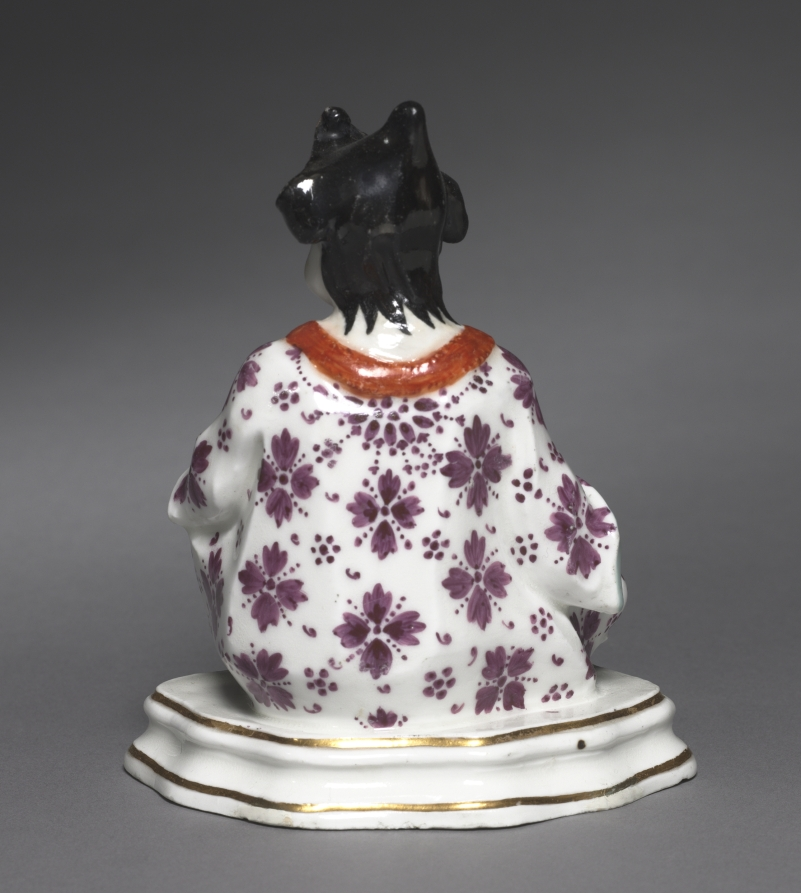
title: Seated Chinese Figure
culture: Germany, Meissen, 18th century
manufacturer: Meissen Porcelain Factory (German, est. c. 1710)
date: c. 1730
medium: porcelain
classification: Ceramic